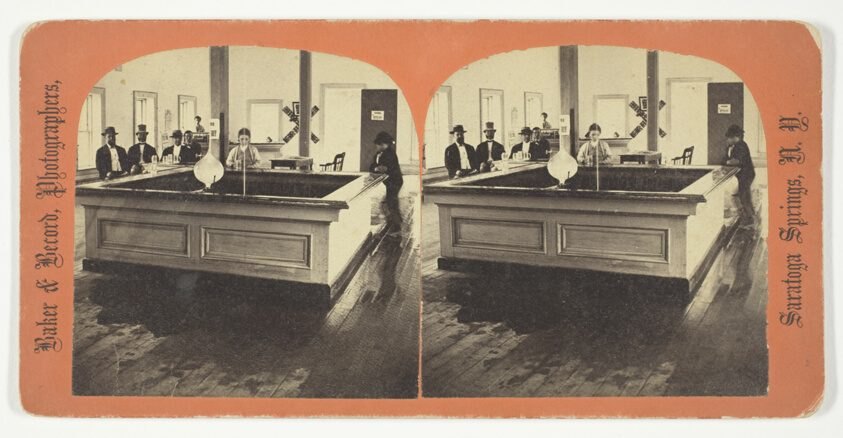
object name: Photograph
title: Geyser Spring, from the series "Saratoga Springs, N. Y."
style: 19th century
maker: Baker & Record, Photographers (American, active late 19th century)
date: 1875/99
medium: Albumen print, stereo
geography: Saratoga Springs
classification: photography; photograph